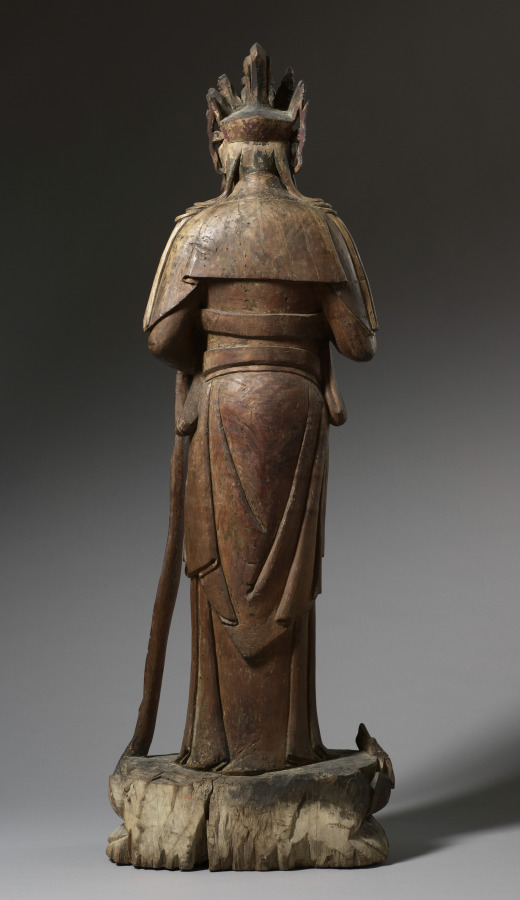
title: Standing Guanyin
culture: China, Southern Song dynasty (1127–1279)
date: 1127–1279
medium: wood with traces of gesso, polychromy and gilding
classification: Sculpture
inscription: Inscribed on scarf end: [for] our mentor Yüan-sheng [from] abbot-priest Ch'eng-lang, disciple Chin-yen, and second-generation disciple Wu-huai (trans. Wai-kam Ho)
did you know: This bodhisattva Guanyin was carved from a single block of willow wood.